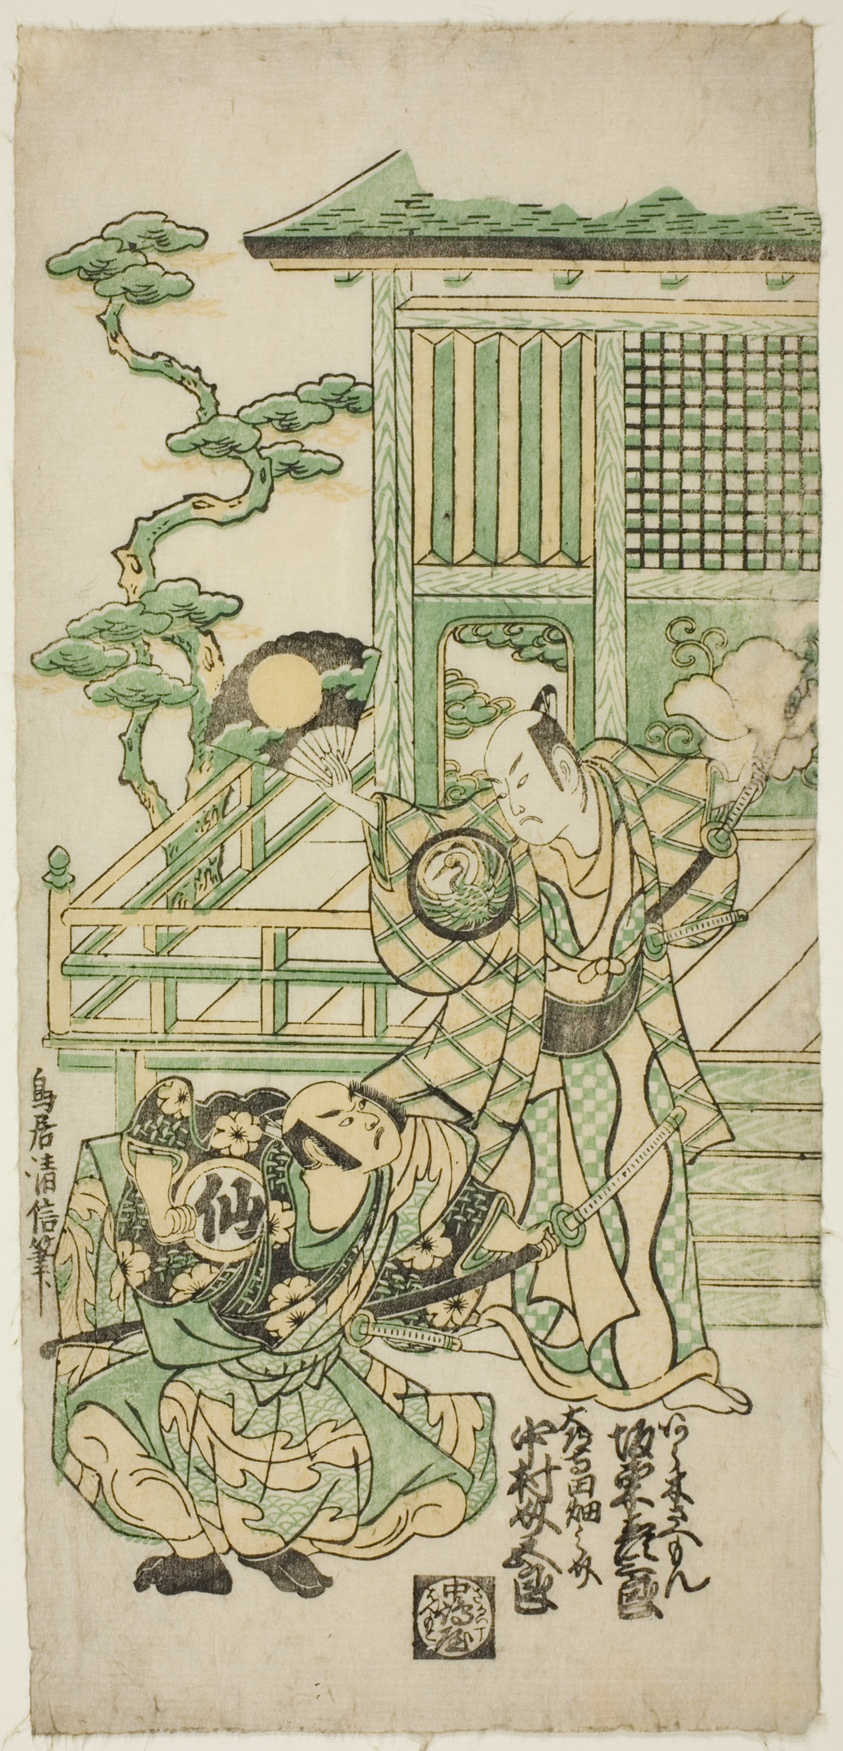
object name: Print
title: The Actors Bando Hikosaburo I as Araki Shozaemon and Nakamura Sukegoro I as Daidoji Tahatanosuke in the play "Chigozakura Futabajikki," performed at the Ichimura Theater in the tenth month, 1746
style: Japanese (culture or style)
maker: Torii Kiyonobu II (Japanese, active c. 1725-61)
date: 1746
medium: Color woodblock print; hosoban, benizuri-e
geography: Japan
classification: woodblock print; print; asian art